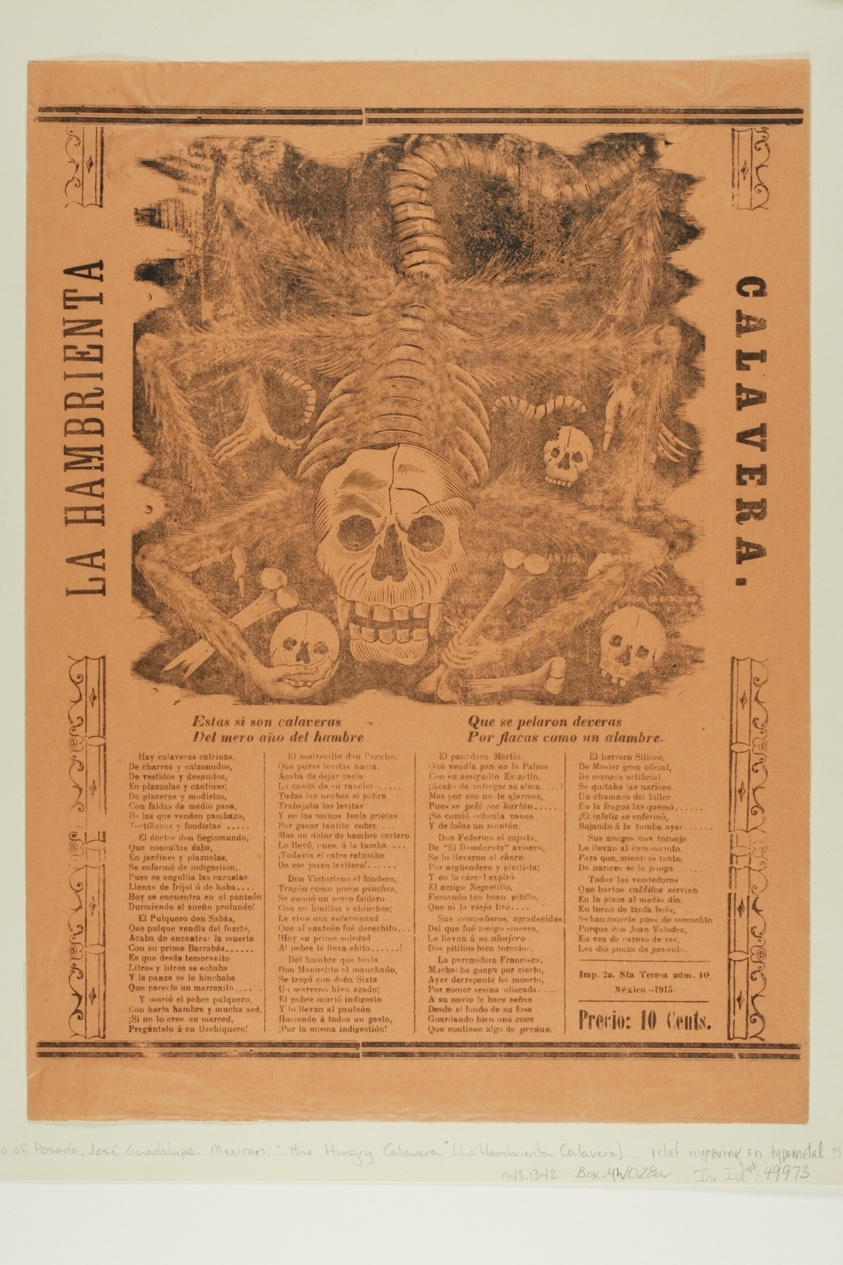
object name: Print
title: The Starving Calavera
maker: José Guadalupe Posada (Mexican, 1852-1913)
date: 1915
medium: Relief engraving in typemetal on orange wove paper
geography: Mexico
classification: relief etching; print; prints and drawing